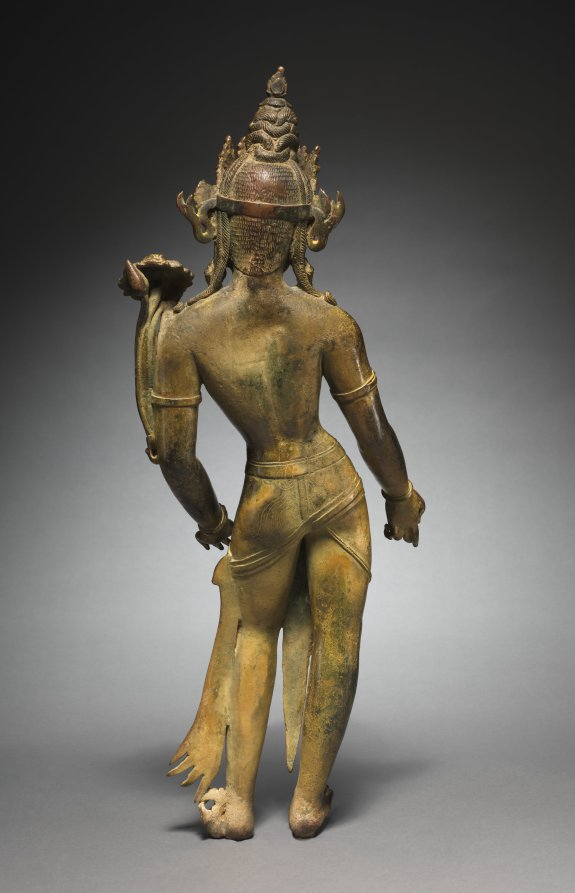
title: Avalokitesvara Padmapani: Bodhisattva of Mercy Bearing a Lotus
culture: Nepal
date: c. 1000s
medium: bronze with gilding, pigment, and semiprecious stones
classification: Sculpture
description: Venerated by Buddhists across the world as the perfect embodiment of compassion for all beings, this bodhisattva-a being only one stage away from complete enlightenment-holds his right hand out gently in the gesture of gift-giving. In his left hand, he once grasped the stem of a lotus flower that blossoms over his left shoulder, indicative of the abundant benefits that result from acts of loving kindness. All bodhisattvas wear royal garments and jewels, in reference to the historical Buddha’s early life as a prince, prior to his achievement of enlightenment through meditations in the forest. In the center of his crown is the tiny seated image of the meditating Buddha Amitabha that identifies this figure as Avalokitesvara specifically. Nepalese bronzes of the 11th century are solid cast and have an exceptionally high copper content in the alloy that makes the bronze difficult to manage during fabrication. The color achieved by the extra copper creates a distinctive warmth and softness in the sculpture. The flexed toes of the right foot and the swinging to one side of the gathered ends of his garment impart a sense of dynamism to his ongoing act of giving. His facial expression is sweet and placid but sharp, as though he is keenly aware of the sufferings of the world.